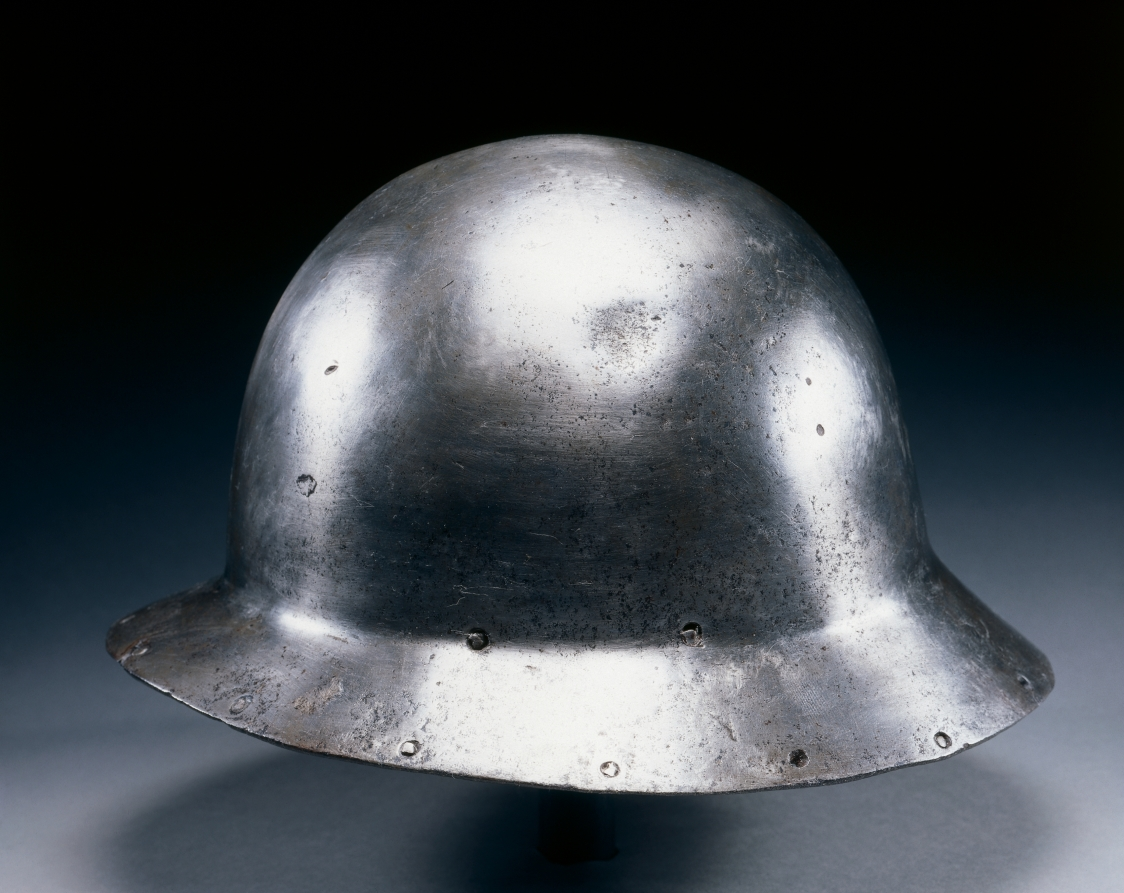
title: Kettle Hat (War Hat)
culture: Italy, 15th century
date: c. 1460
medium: steel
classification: Arms and Armor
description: Open helmets like this one were used by medieval infantries. The helmet weighs 12-1/2 pounds. This unusual weight was required for siege purposes—such helmets were worn by the men who attempted to scale the walls of an armed town. The rivet holes along the ridge were for the attachment of the liner.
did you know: Modern soldiers wear Kevlar combat helmets that weigh four to five pounds. By comparison, this medieval helmet is nearly three times as heavy. Imagine what it would have been like to wear such a heavy piece of equipment on your head during a siege.